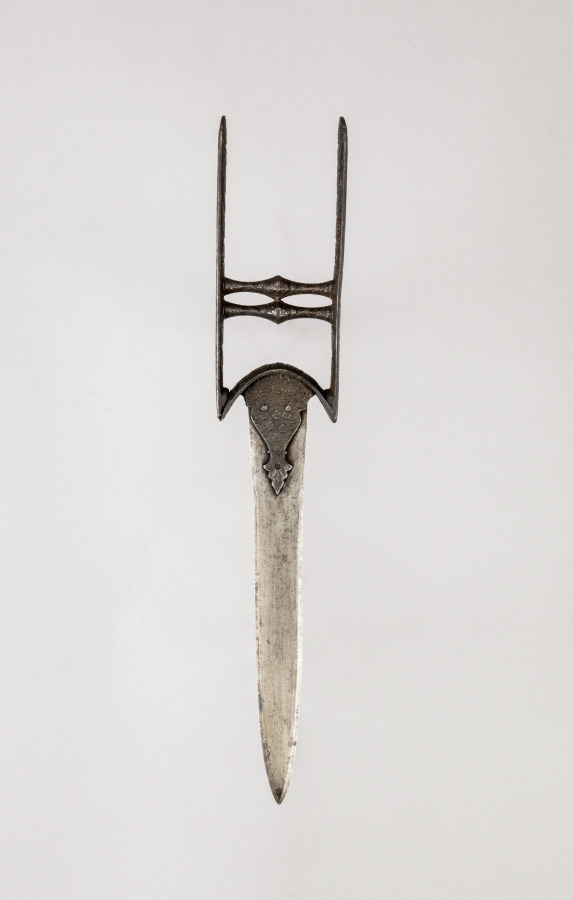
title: Khatar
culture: Northwestern India, Rajasthan, Jaipur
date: 1600s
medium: iron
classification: Arms and Armor